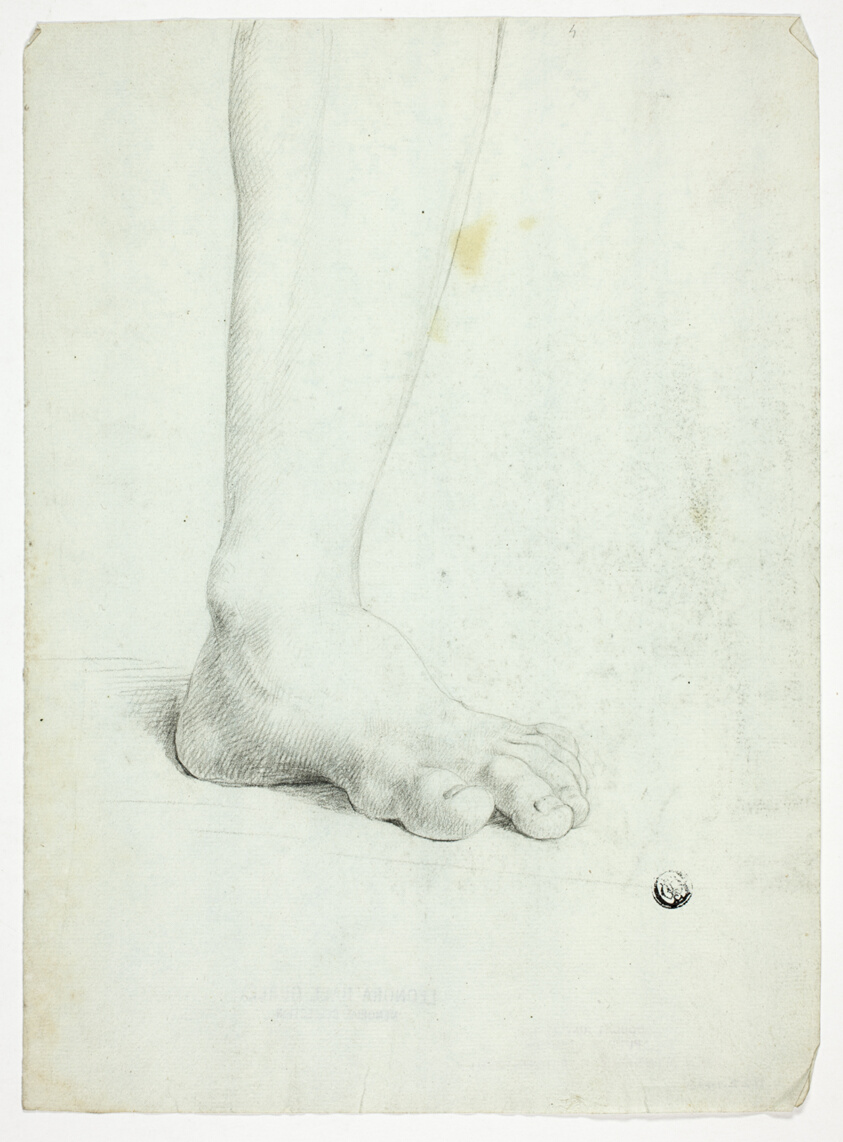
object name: Drawing and Watercolor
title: Left Leg of Standing Figure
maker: John Downman (English, 1750-1824)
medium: Charcoal on pale blue laid paper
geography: England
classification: charcoal; drawings (visual works); prints and drawing